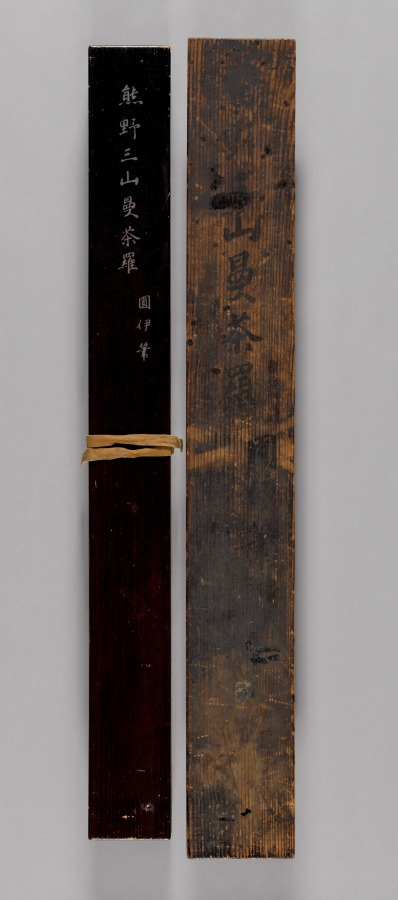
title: Mandala of the Three Shrines at Kumano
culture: Japan, Kamakura period (1185–1333) to Nanbokuchō period (1336–92)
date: 1300s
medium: hanging scroll; ink and color on silk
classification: Painting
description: This painting depicts the three shrines of Kumano from a bird’s-eye perspective, with the Buddhist counterparts of the kami of each shrine hall shown in discs directly above the halls. It also features figures, both pilgrims and deities, along the pilgrimage route and at the shrines. It is the only surviving work illustrating architectural representations of all three shrines in the same painting. They are compressed into a stacked composition, with the Nachi shrine at the top, the Shingū in the middle, and the Hongū at the bottom.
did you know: The sacred waterfall at the top right of the painting is called Nachi.